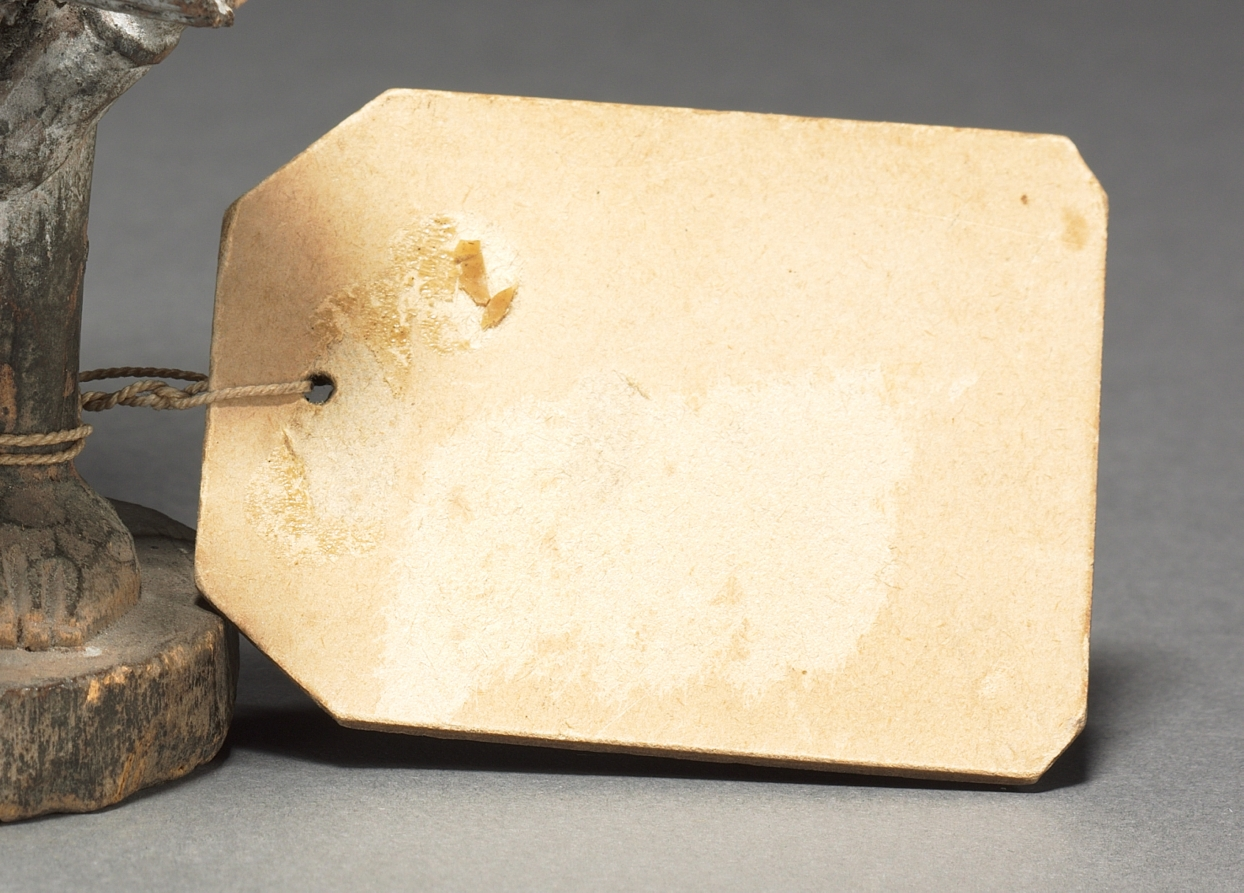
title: Power figure (nkisi)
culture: Central Africa, Republic of the Congo, Kongo people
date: late 1800s-early 1900s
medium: Wood, organic materials (including resin), probably kaolin, and metalized glass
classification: Sculpture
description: This figure is of the nduda type, characterized by the attached "guns" loaded with gunpowder and used to shoot witches. It is the only figure that adopts the threatening pose: the right hand raised, holding a spear or knife, and the left hand resting on the hip. Two guns protrude horizontally on both sides of the cylindrical medicine pack on the belly, covered with a round piece of mirror.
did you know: This is the only figure in a group of seven found in a French antique shop adopting a threatening pose.